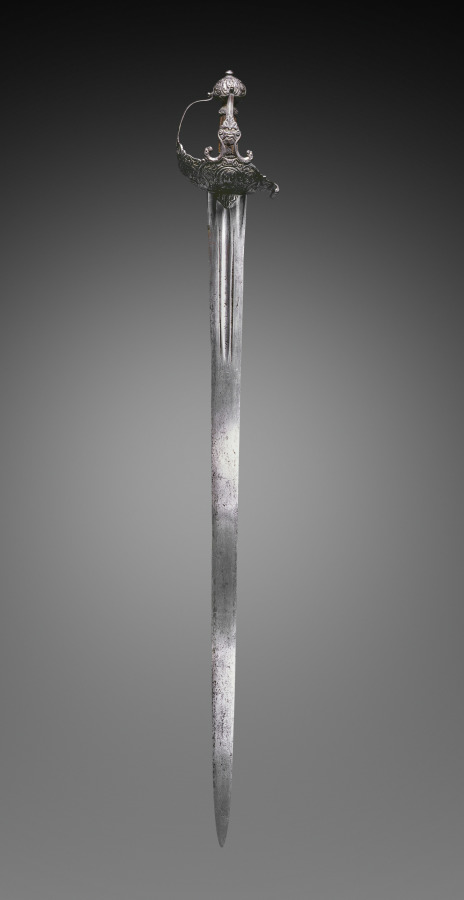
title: Basket-Hilt Broadsword ("Mortuary Sword")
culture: Hilt: England; Blade: Germany, Solingen (?), Hilt: 17th Century; Blade: 18th Century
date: hilt: c. 1640–50; blade: 1700s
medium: steel, chiseled; inlaid gilt- silver foil; wood and wire grip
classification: Arms and Armor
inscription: ANDRIA FERRARA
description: The decoration on this sword's hilt includes an image of King Charles I of England (beheaded in 1649). Because the image resembles the king's death mask, this sword is known as a "mortuary sword." It may have belonged to Sir Thomas Fairfax, a general of the Parliamentary cavalry during the English Civil War (1642-51). Large, double-edged broadswords, designed for heavy cavalry use, were common from the 1600s through the 1800s.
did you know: The ornate basket hilt which protects the hand, is chiseled with leafy decorative scrollwork and grotesque masks.